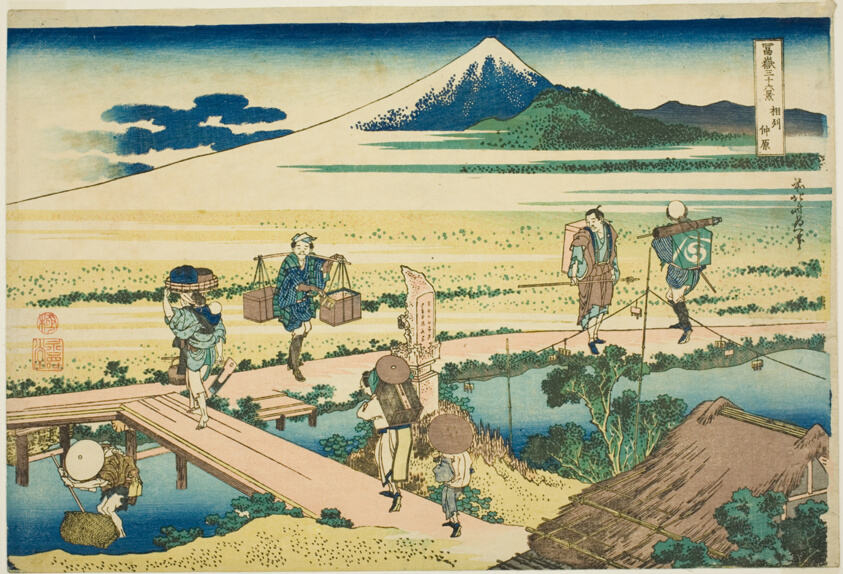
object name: Print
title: Nakahara in Sagami Province (Soshu Nakahara), from the series "Thirty-six Views of Mount Fuji (Fugaku sanjurokkei)"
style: Japanese (culture or style)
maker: Katsushika Hokusai 葛飾 北斎; Japanese, 1760-1849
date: c. 1830/33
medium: Color woodblock print; oban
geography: Japan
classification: woodblock print; print; asian art